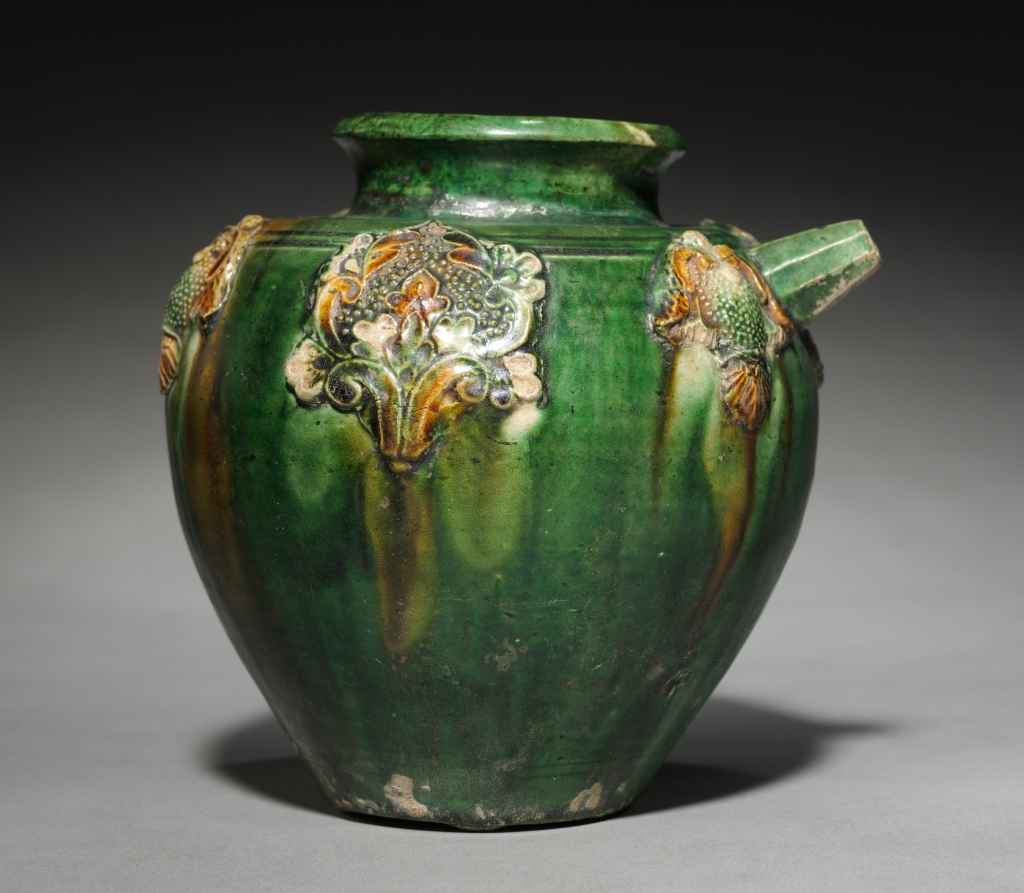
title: Jar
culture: China, Tang dynasty (618-907)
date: late 600s–700s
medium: pottery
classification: Ceramic